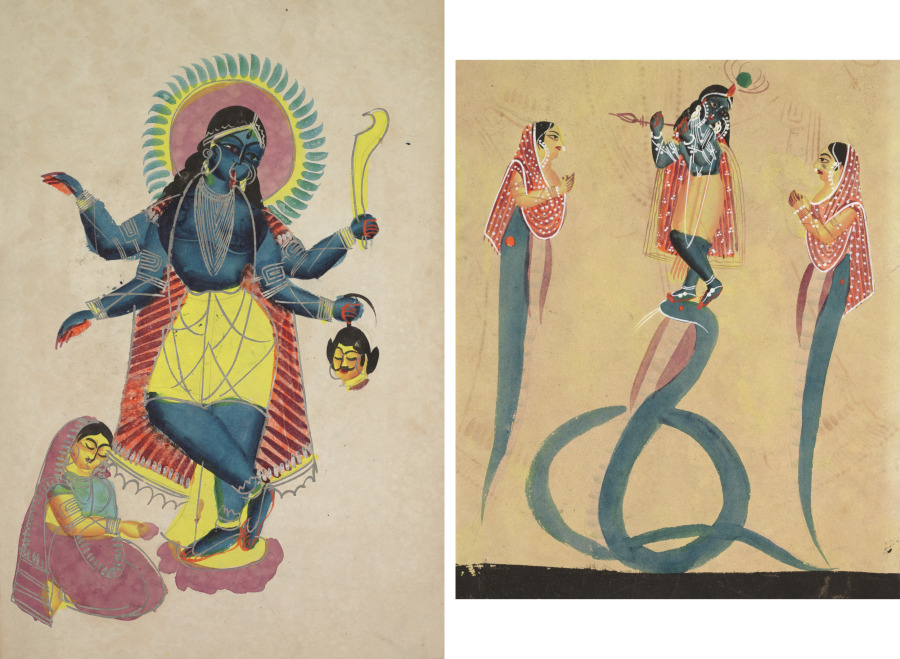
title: Leaf from a Kalighat album: Krishna as Kali worshipped by Radha (recto); Krishna quells the serpent Kaliya (verso)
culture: Eastern India, Bengal, Kolkata, Kalighat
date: c. 1890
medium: Gum tempera, graphite, and ink on paper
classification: Painting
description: Krishna’s cowgirl (gopi) Radha was Ayanaghosha’s wife, and her devotion to him transcended marital ties. Whenever Radha was together with Krishna and her husband appeared, Krishna instantly transformed himself into Kali and Radha into her devotee. Radha, a model devotee, symbolizes the human soul and its longing for god. Her willingness to break the rules of duty (dharma) exemplifies her devotion. On the verso is another scene from Krishna's life. The serpent Kaliya was poisoning the water of a great pool by the Yamuna River, near the residence of the cowherd community where Krishna spent his youth. The animals were dying from the toxins. Krishna wrestled the mighty serpent, then emerged from the water to dance on his head. Pleading with Krishna to set him free, Kaliya’s wives are shown like mermaids.